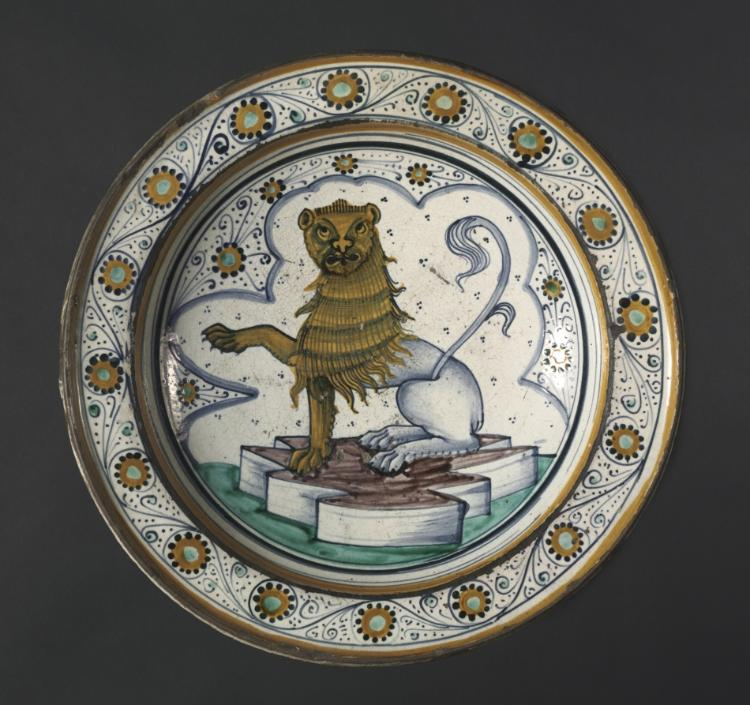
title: Plate Depicting a Lion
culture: Italy, Cafaggiolo, 15th century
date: late 1400s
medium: tin-glazed earthenware (maiolica)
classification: Ceramic